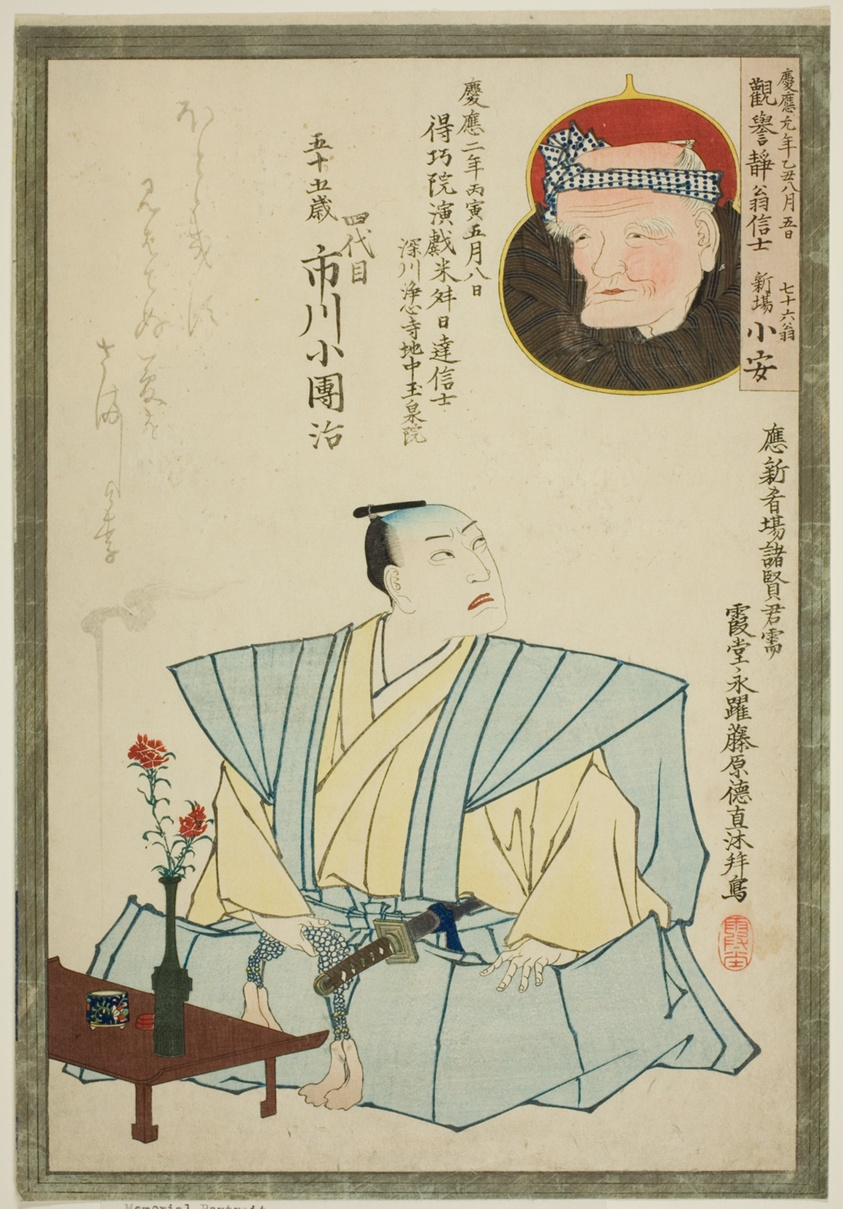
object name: Print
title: Memorial Portrait of the Actor Ichikawa Kodanji IV and Poet Shinba Koyasu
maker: Artist Unknown; Japanese, 19th century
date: 1866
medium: Color woodblock print; oban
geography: Japan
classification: print; asian art